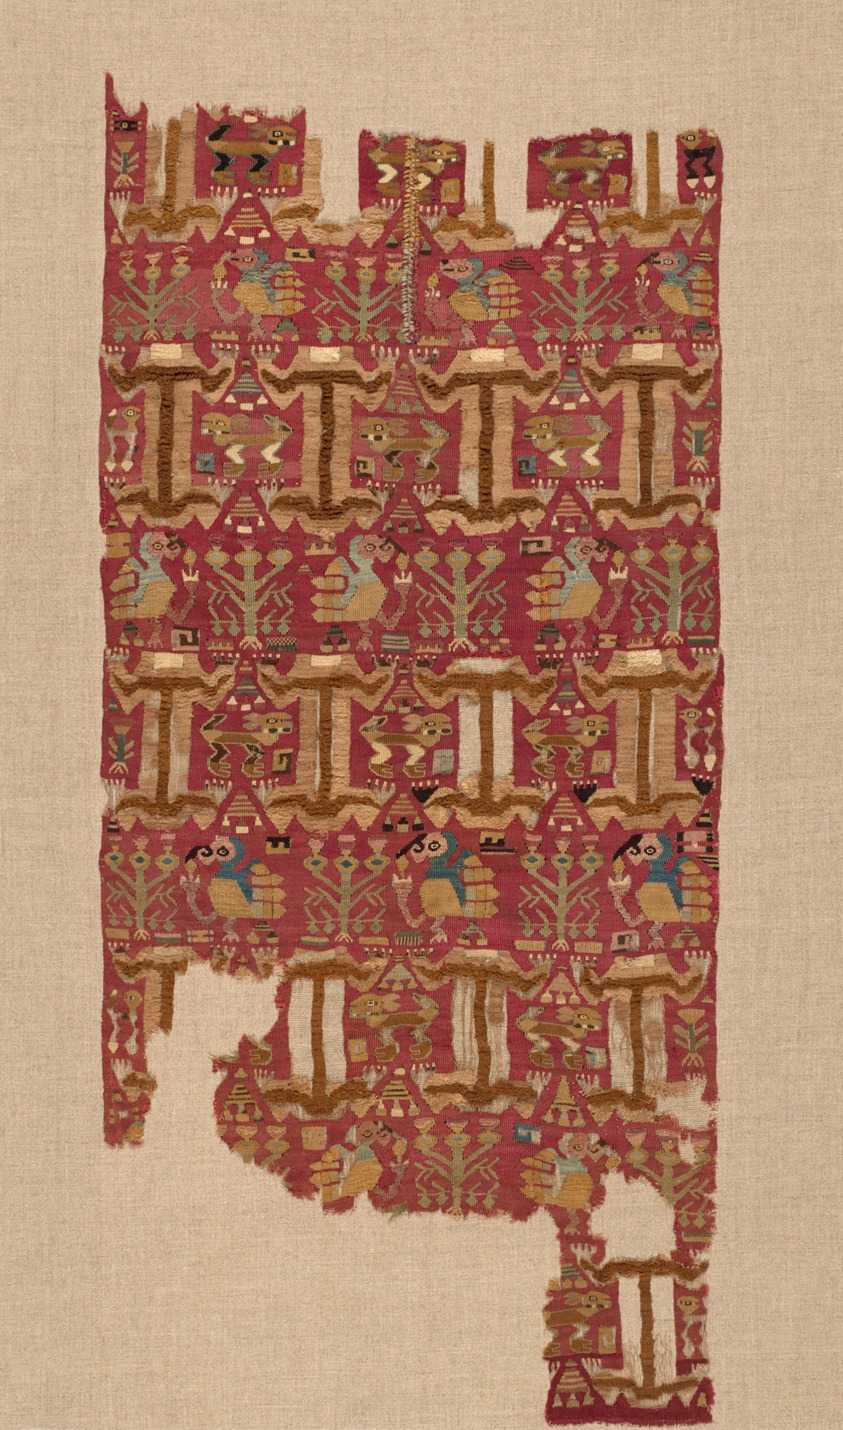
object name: Textile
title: Panel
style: lambayeque, Pre-Columbian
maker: Lambayeque (North coast, Peru)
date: 1000/1476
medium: Cotton and wool (camelid), slit tapestry weave with single warp wrapping, outlining and eccentric wefts, and uncut weft loop pile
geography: Peru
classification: textile; weaving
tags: llama, birds, animals, plants, flowers, parrots, super/natural